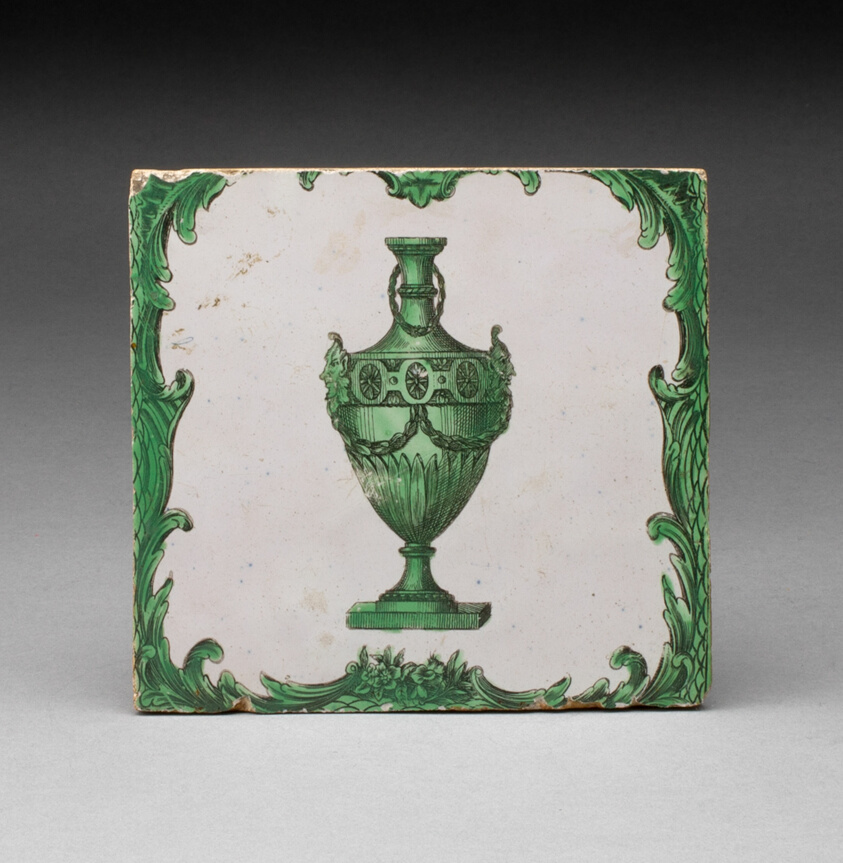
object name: Ceramics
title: Tile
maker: England, Liverpool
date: 1775/80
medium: Tin-glazed earthenware, transfer-printed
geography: Liverpool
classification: earthenware; tin-glazed ware; european decorative arts; ceramics